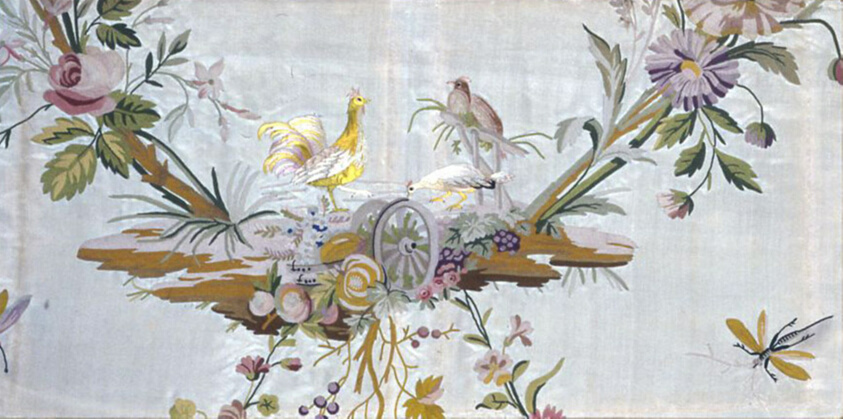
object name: Textile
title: Fragment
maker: After a design by Philippe de LaSalle (French, 1723–1803/5); France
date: 1775/80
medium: Silk, warp-float faced 7:1 satin weave; embroidered with silk in chain, satin, single satin and stem stitches; French knot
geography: France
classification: textile; needlework (visual works)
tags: foliage, animals, birds, flowers